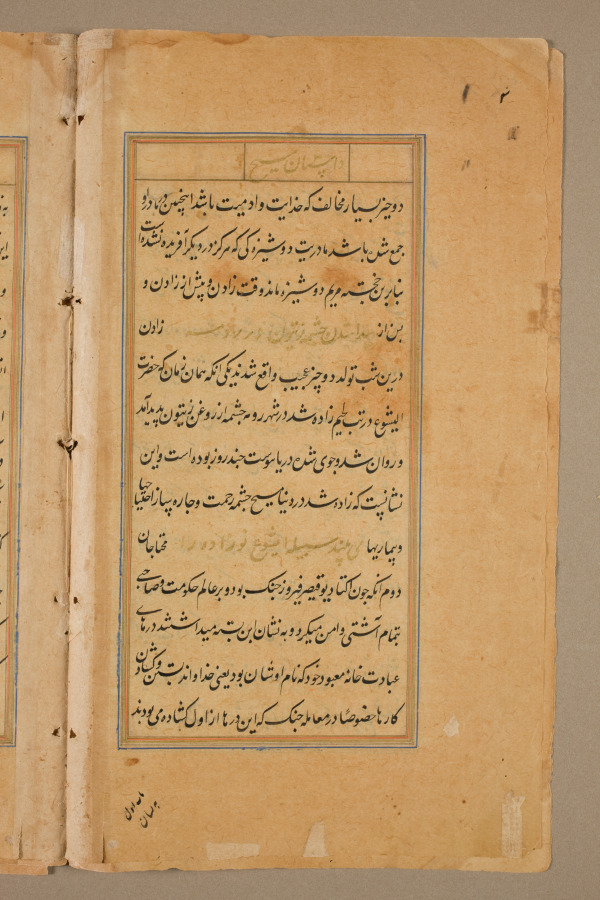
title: Text page from a Mirror of Holiness (Mir’at al-quds) of Father Jerome Xavier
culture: Mughal India, Allahabad, made for Prince Salim (1569–1627)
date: 1602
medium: Ink and gold on paper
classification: Manuscript